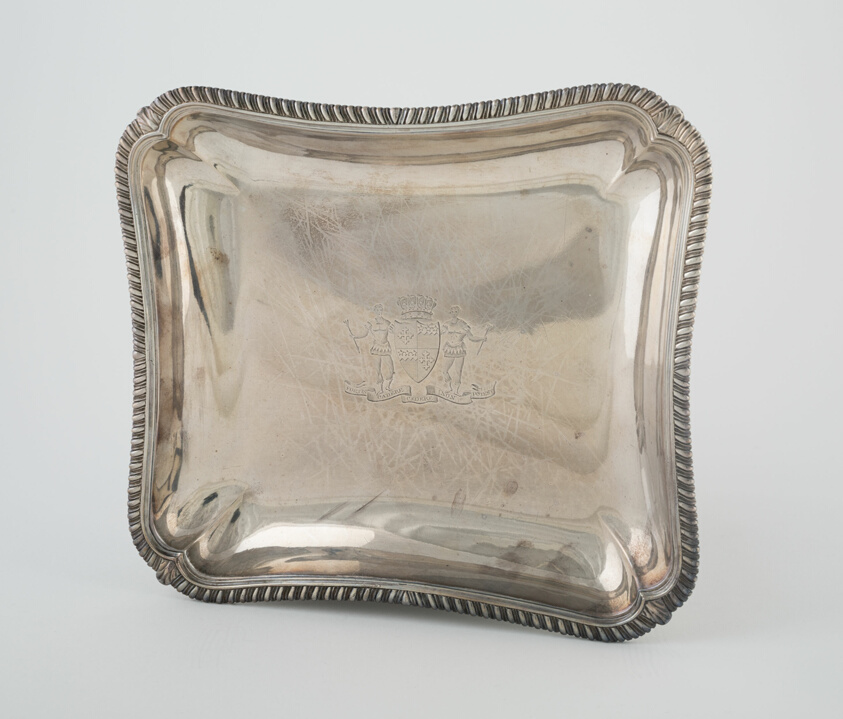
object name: Metalwork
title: Dish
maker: London, England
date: 1809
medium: Silver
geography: London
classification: dish (vessel); silver; metalwork; european decorative arts